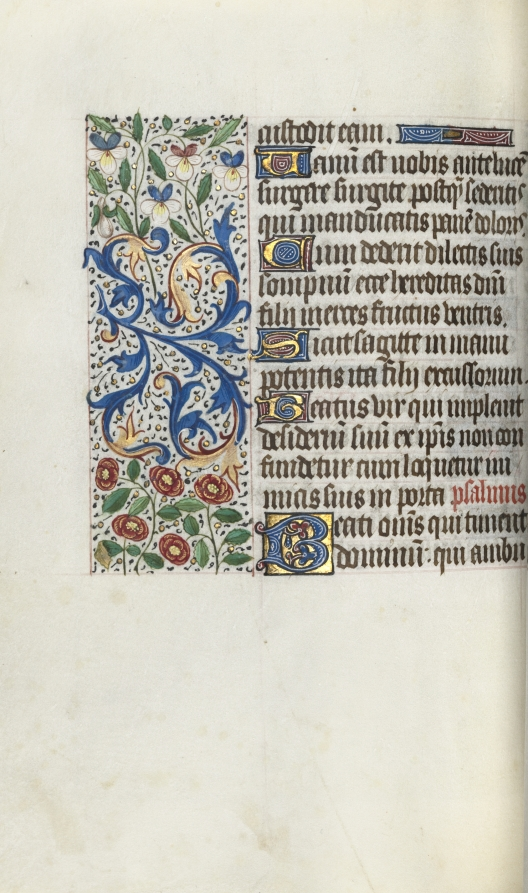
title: Book of Hours (Use of Rouen): fol. 68v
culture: France, Rouen, 15th century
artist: Master of the Geneva Latini (French, active Rouen, 1460–80)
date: c. 1470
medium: ink, tempera, and gold on vellum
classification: Bound Volume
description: In the late 1400s and early 1500s Rouen was an established and important center of book production. The city’s cathedral had a wealthy chapter that spent large sums of money to commission books and to maintain its extensive library. The stationers and booksellers would have likely been concentrated in or near the cathedral precinct. This artist, named after a manuscript now in Geneva, was Rouen’s principal illuminator during the second half of the 1400s.